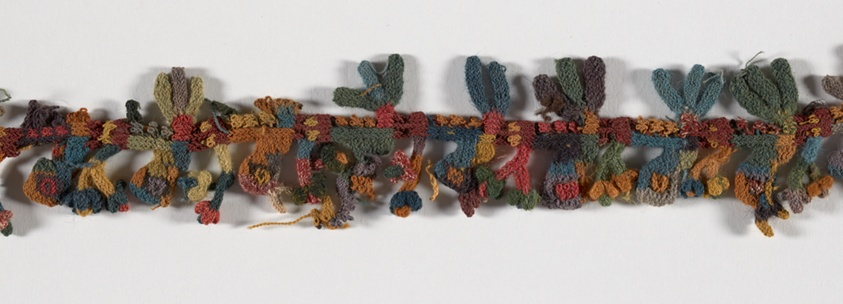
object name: Textile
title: Border Fragment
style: nazca, andean, andes, Pre-Columbian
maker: Nazca; South coast, Peru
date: 100 B.C./A.D. 200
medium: Wool (camelid), tubular cross-knit looping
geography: Peru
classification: textile; weaving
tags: super/natural